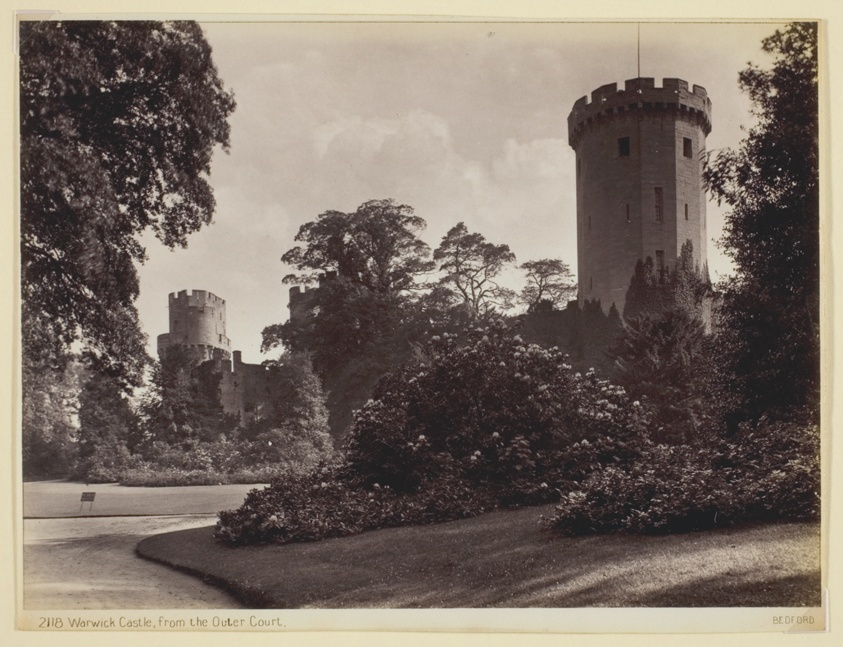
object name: Photograph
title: Warwick Castle, from the Outer Court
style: 19th century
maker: Francis Bedford (English, 1816–1894)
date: 1860/94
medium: Albumen print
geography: England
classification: albumen silver print; photographic process; photography; photograph